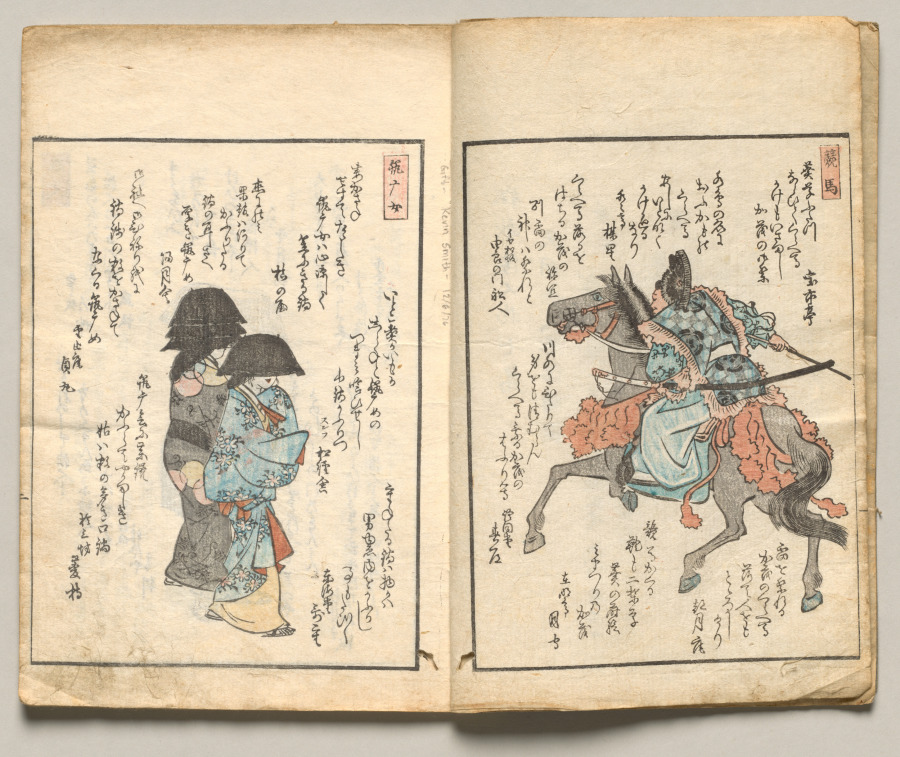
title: Spread Two from Volume Seven of People of Japan in Light Verse (Kyōka)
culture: Japan, Edo period (1615–1868)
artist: Utagawa Hiroshige (Japanese, 1797–1858)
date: 1857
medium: Woodblock-printed book; ink and color on paper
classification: Bound Volume